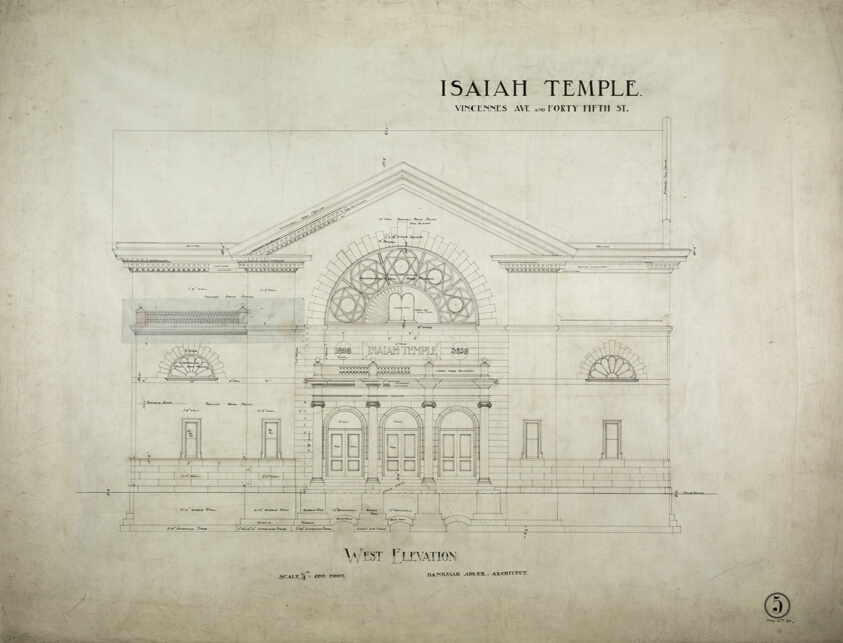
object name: Architectural Drawing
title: Isaiah Temple, Chicago, Illinois, West Elevation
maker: Dankmar Adler (American, 1844-1900)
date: 1898/99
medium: Black and brown ink on linen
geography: Chicago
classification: architectural drawing